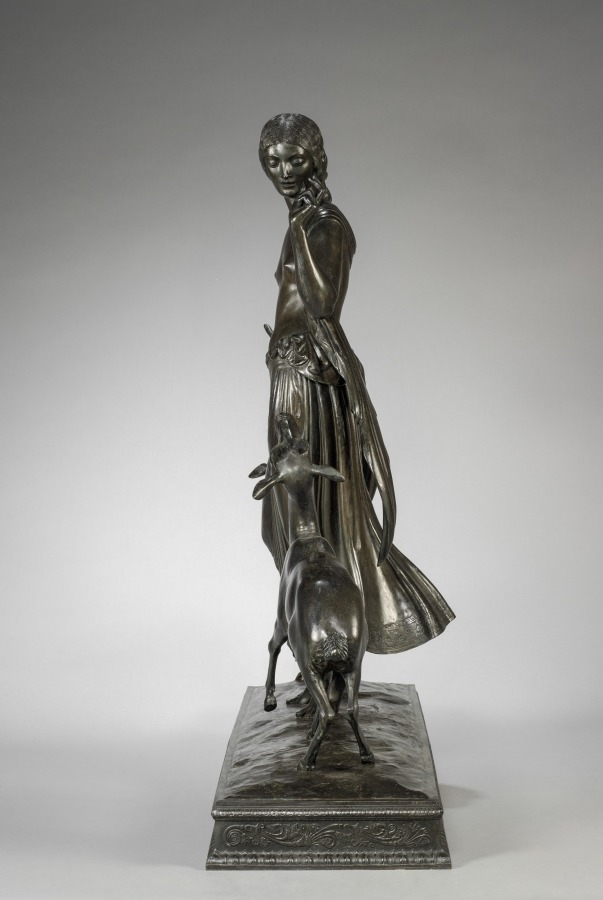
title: Dancer and Gazelles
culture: America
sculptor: Paul Manship (American, 1885–1966)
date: 1916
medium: bronze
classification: Sculpture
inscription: Signed on base: PAUL MANSHIP © 1916.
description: One of Manship’s most popular compositions, this work established his reputation as an important up-and-coming sculptor. Here, his mastery of elegant silhouette is manifest through the gracefully posed dancer and her sleek animal companions. Stylized decorative patterning embellishes the dancer’s hair and swaying skirt.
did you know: Initially interested in painting, Manship opted to pursue sculpture after discovering he had color vision deficiency.